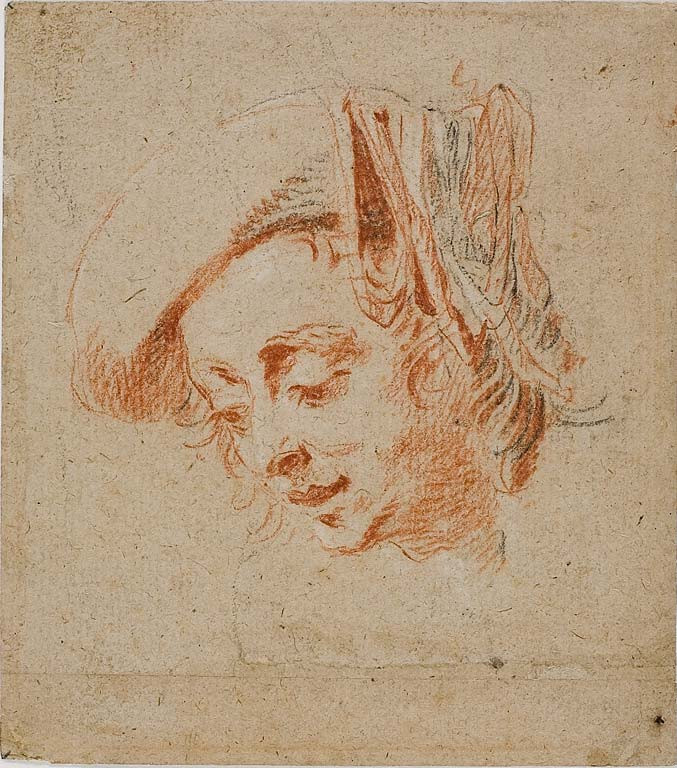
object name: Drawing and Watercolor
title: Head of a Man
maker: Nicolas Lancret (French, 1690-1743)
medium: Red and black chalk on tan laid paper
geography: France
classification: chalk; drawings (visual works); prints and drawing